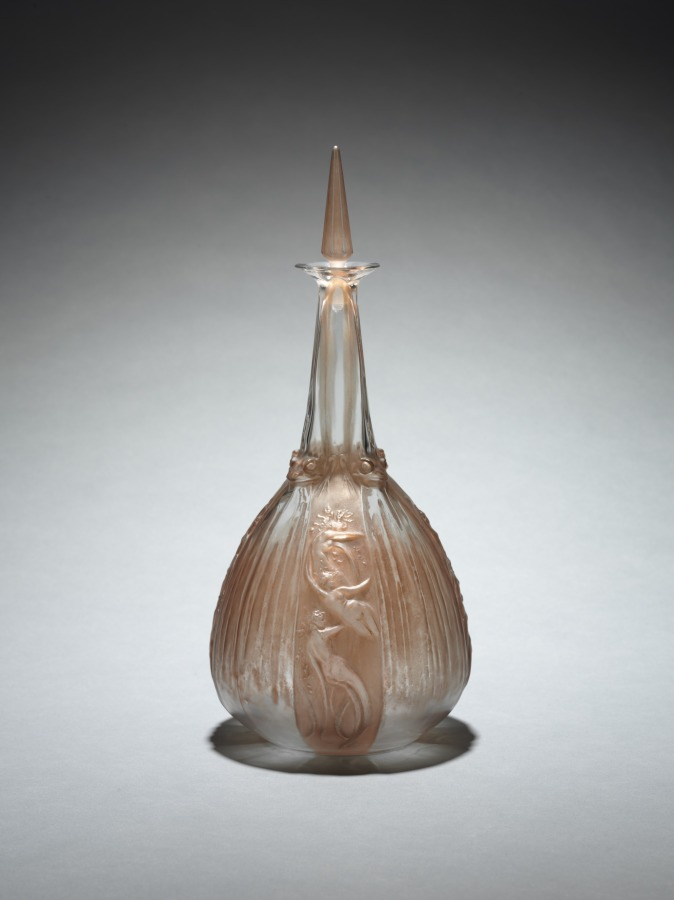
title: Mermaids and Frogs Decanter (Carafe sirènes et grenouilles)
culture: France, 20th century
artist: René Lalique (French, 1860–1945)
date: 1917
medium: glass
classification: Glass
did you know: The title of this work translates to mermaids and frogs carafe.